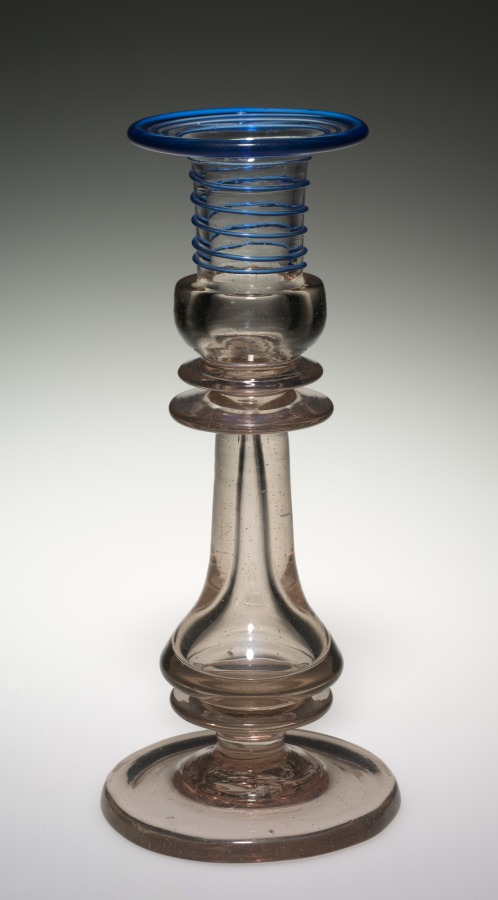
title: Candlestick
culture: America, Pennsylvania, Pittsburgh ?, mid-19th century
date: mid-1800s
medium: glass and detachable pewter bobeche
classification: Glass